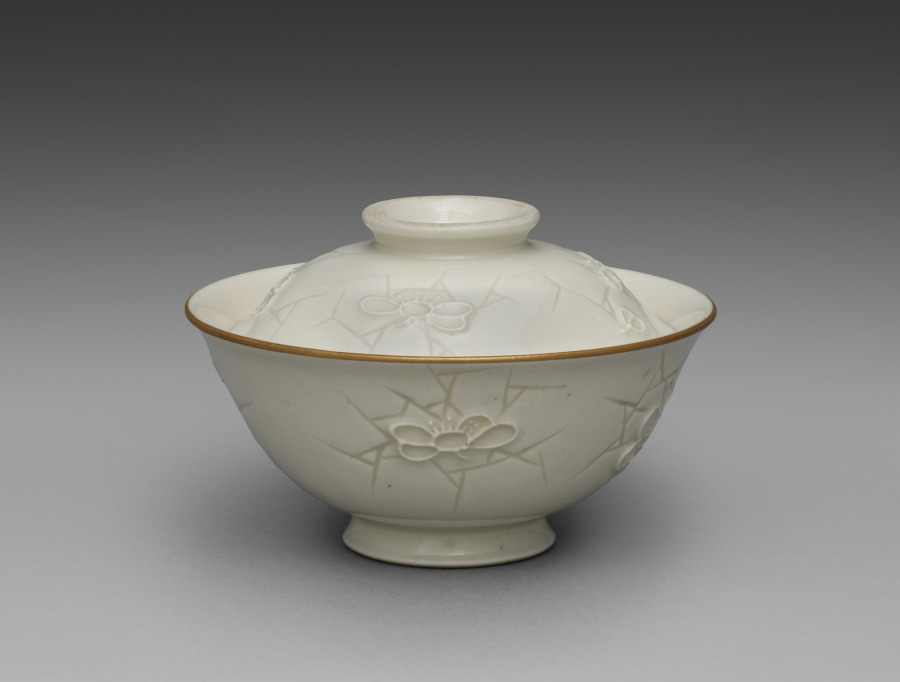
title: Covered Bowl from Dining Set with Plum Blossoms and Cracked-Ice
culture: Japan, Meiji period (1868–1912)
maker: Seifū Yohei II (Japanese, 1844–1878)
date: c. 1875–78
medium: Porcelain with molded designs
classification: Ceramic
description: Each item in this set has a delicate low-relief design of flowering plum branches over scattered, intersecting lines meant to resemble the cracked-ice surface of a frozen body of water and is signed on the base in gold pigment. While Yohei II produced many fine works in underglaze blue, like those produced by Kiyomizu Shichibei, he also made works in quite different styles later in his career, from the early 1870 s. In 1873, he was appointed purveyor to the Industrial Center of Kyoto Prefecture, a designation associated with Kyoto’s efforts to reach an international market through the port of Kobe; and from 1875 until his death, he was involved in national-level projects to present Japanese ceramics across the world. It was during this period that Yohei III was apprenticed to Yohei II, and it has been suggested that this set may in fact be an early example of Yohei III’s work, which he signed with his teacher’s name. Decorated with flowers resembling Japanese textile motifs, the set calls to mind the design of Yohei II’s pair of vases with plum blossoms in the Victoria and Albert Museum. Here, the elaborate trees created for a formal public exhibition setting have been translated into the approachable blossoms of the genteel domestic environment. While the designs are consistent across the pieces, each raised flower petal and pistil and each incised line in the ice was done by hand, so the cups, bowls, and dishes are similar yet unique. The bottoms of two boxes once identified the set’s owner, but the information has been deliberately obscured with black ink. However, inscriptions still visible appear to indicate two occasions, once at the end of July 1886 , and once again in June 1916 , when parts of the set were requested from Hokura in Niigata Prefecture. The location corresponds to a neighborhood in the present-day city of Jōetsu. The surname Tsuji 辻 also appears on a paper tag affixed to one of the box cloths. Future research may possibly reveal more about their provenance. A vase by Yohei III in a private collection combines the formal grandeur of the Yohei II vases in the Victoria and Albert Museum with the gentler design of this dining set, placing flowering plum trees against soft, scalloped-edge clouds resembling those in golden screens.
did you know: The dining wares have a creamy white coloration that the four boxes containing them identify as Korean in style.